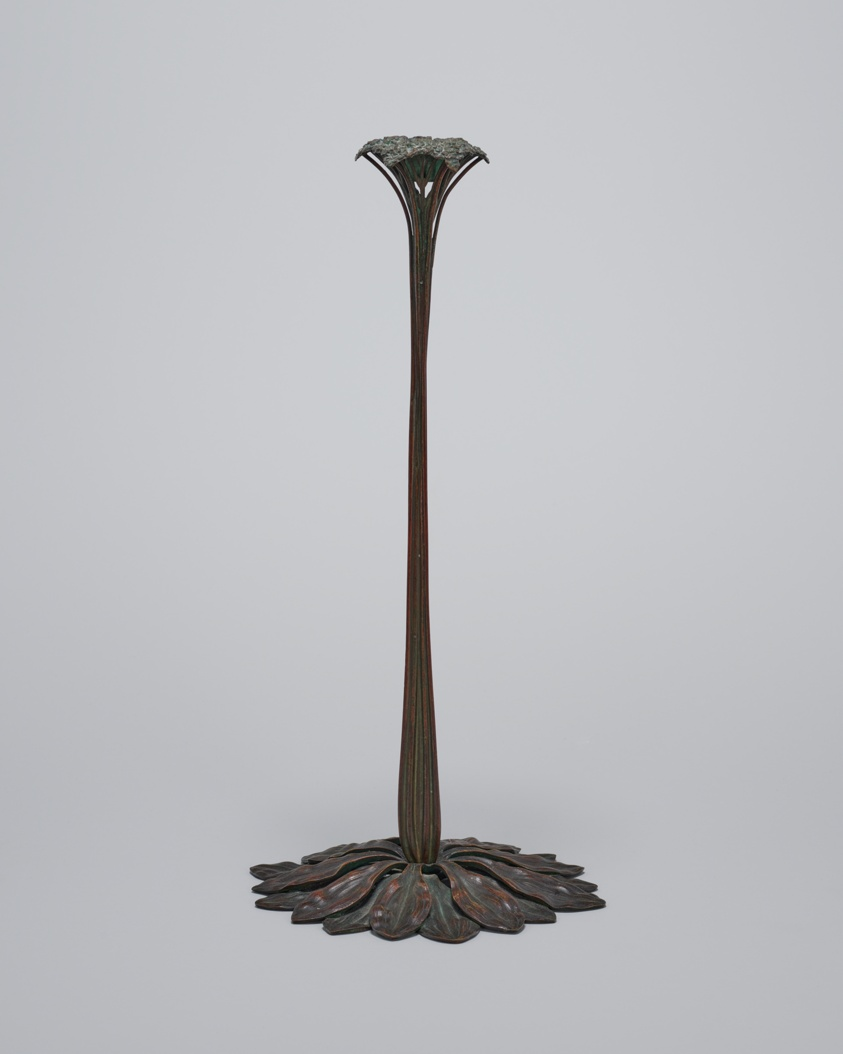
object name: Metalwork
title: “Saxifrage” Candlestick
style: Arts and Crafts Movement, 20th Century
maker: Tiffany Studios (American, 1902–32); Corona, New York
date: c. 1905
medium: Bronze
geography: Corona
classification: candleholder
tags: saxifrage, flowers